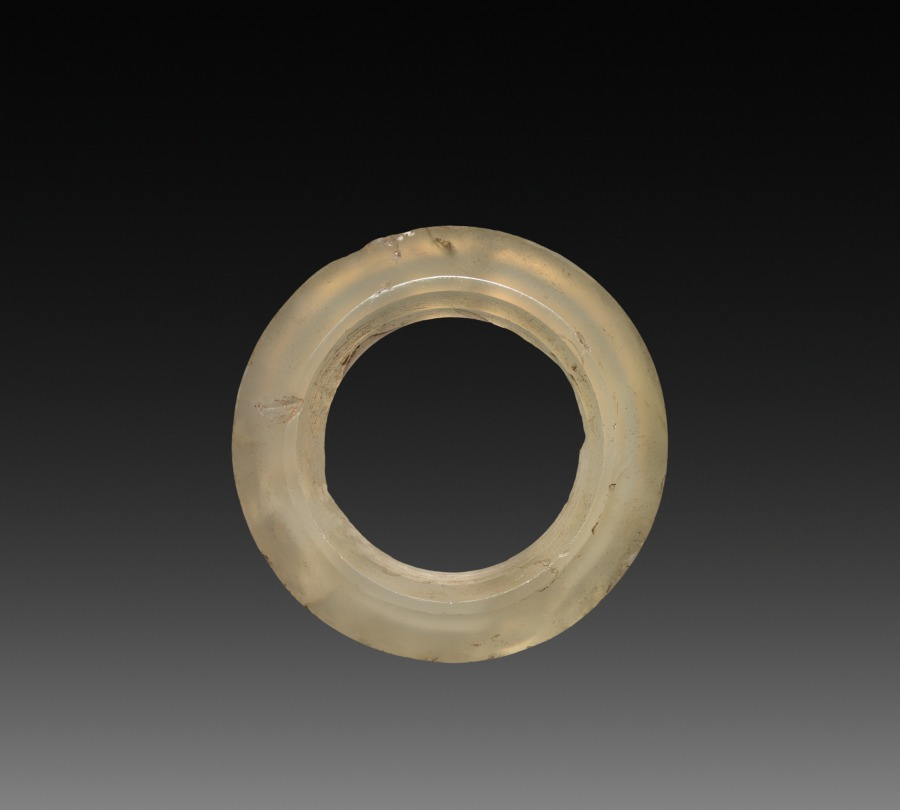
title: Ring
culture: China, Han dynasty (202 BCE–220 CE) or later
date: 200 CE or later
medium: agate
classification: Jewelry